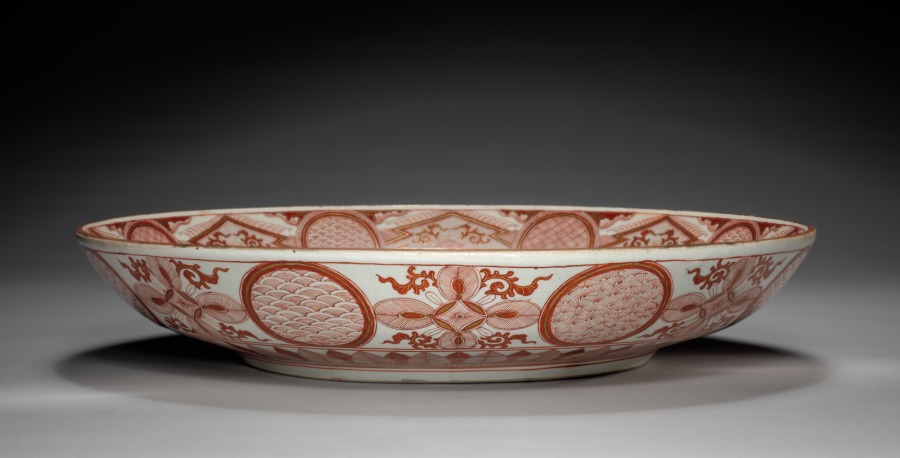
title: Bowl: Kutani Ware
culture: Japan, Edo period (1615–1868)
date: early to mid-1800s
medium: porcelain with overglaze enamel and gold decoration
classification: Ceramic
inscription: on bottom: "Kutani Dashoken ni-oi-te Yagi Jinsaku Sei-su" [Yagi Jinsaku made this bowl at Dashoken factory in Kutani].